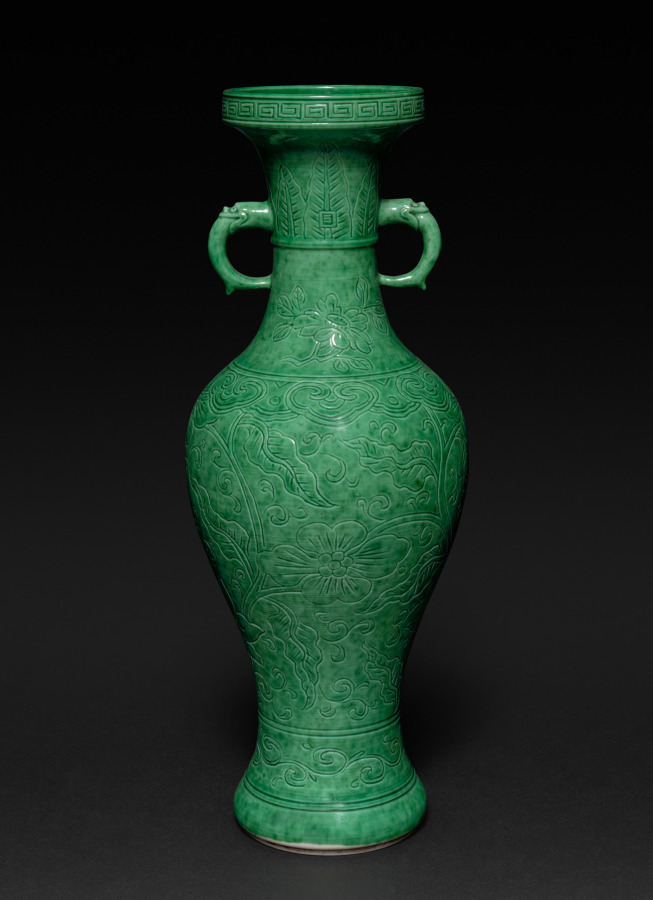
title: Vase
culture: China, Jiangxi province, Jingdezhen kilns, Qing dynasty (1644-1911), Kangxi reign (1662-1722)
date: 1662–1722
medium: glazed white porcelain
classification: Ceramic